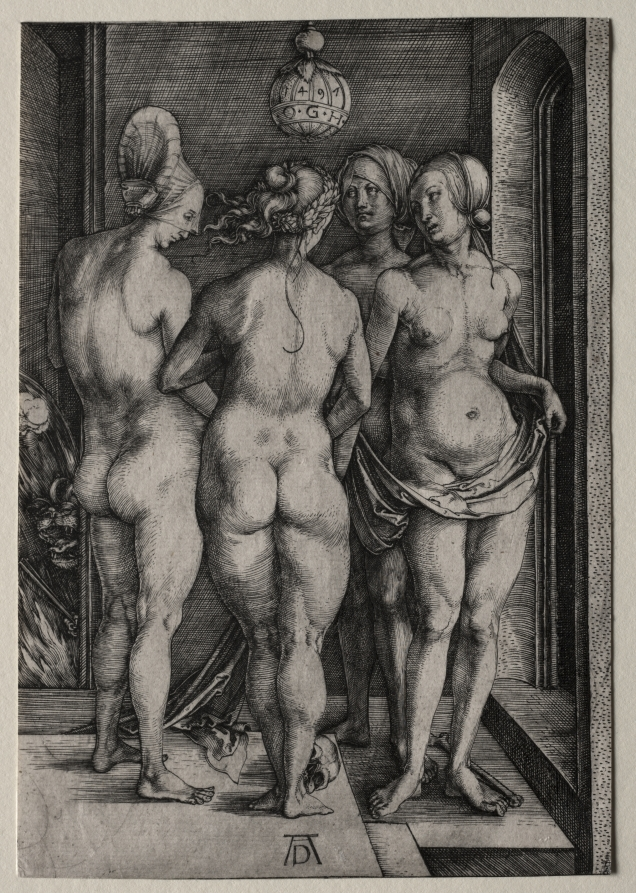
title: The Four Witches (Four Naked Women)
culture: Germany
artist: Albrecht Dürer (German, 1471–1528)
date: 1497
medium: engraving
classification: Print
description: Licentious witches occupied a precarious place during the 16th and 17th centuries, due to their perceived seductive powers that threatened to overturn the patriarchal order of society. The four fleshy women of Albrecht Dürer's beguiling Four Witches exchange vague and shifting glances that suggest sinister intentions. The threatening atmosphere is emphasized by a devil lurking behind an open doorway at the left, and a globe hanging from the ceiling inscribed O.G.H. (O Gott hüte), a proverb that means "Oh God, save us"—in this instance, from these sensual witches.